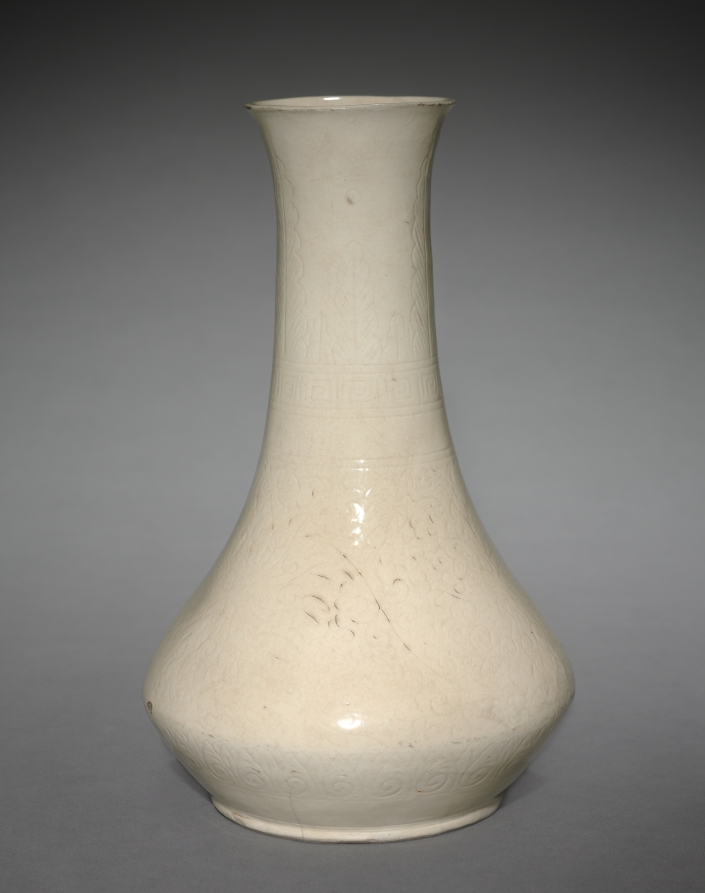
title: Vase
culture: China, Ming dynasty (1368–1644)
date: 1368–1644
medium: porcelain, Ding ware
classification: Ceramic